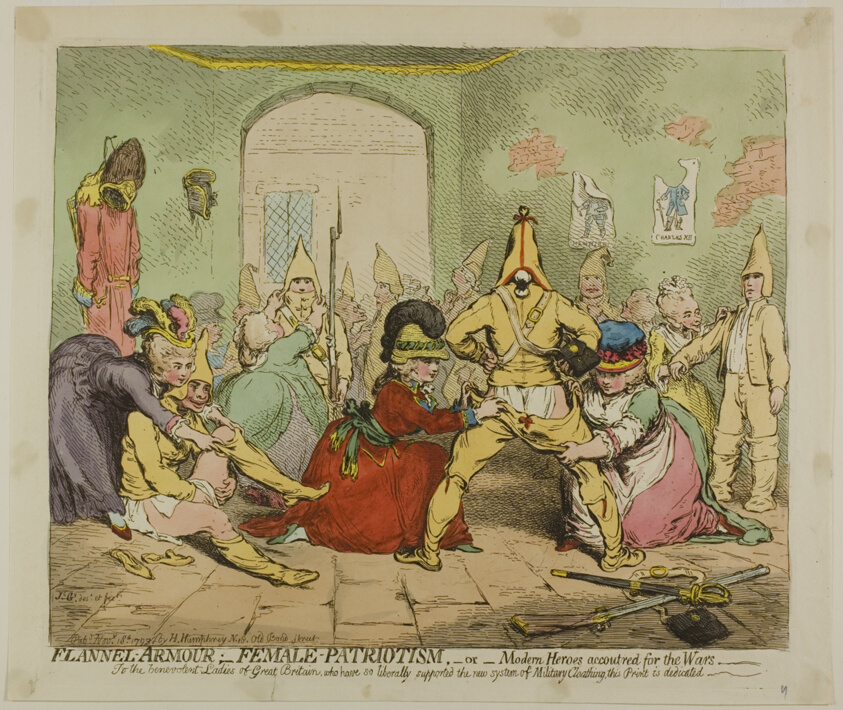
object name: Print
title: Flannel Armour; Female Patriotism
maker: James Gillray (English, 1756-1815); published by Hannah Humphrey (English, c. 1745-1818)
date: published November 18, 1793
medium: Hand-colored etching on paper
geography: England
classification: etching; print; prints and drawing